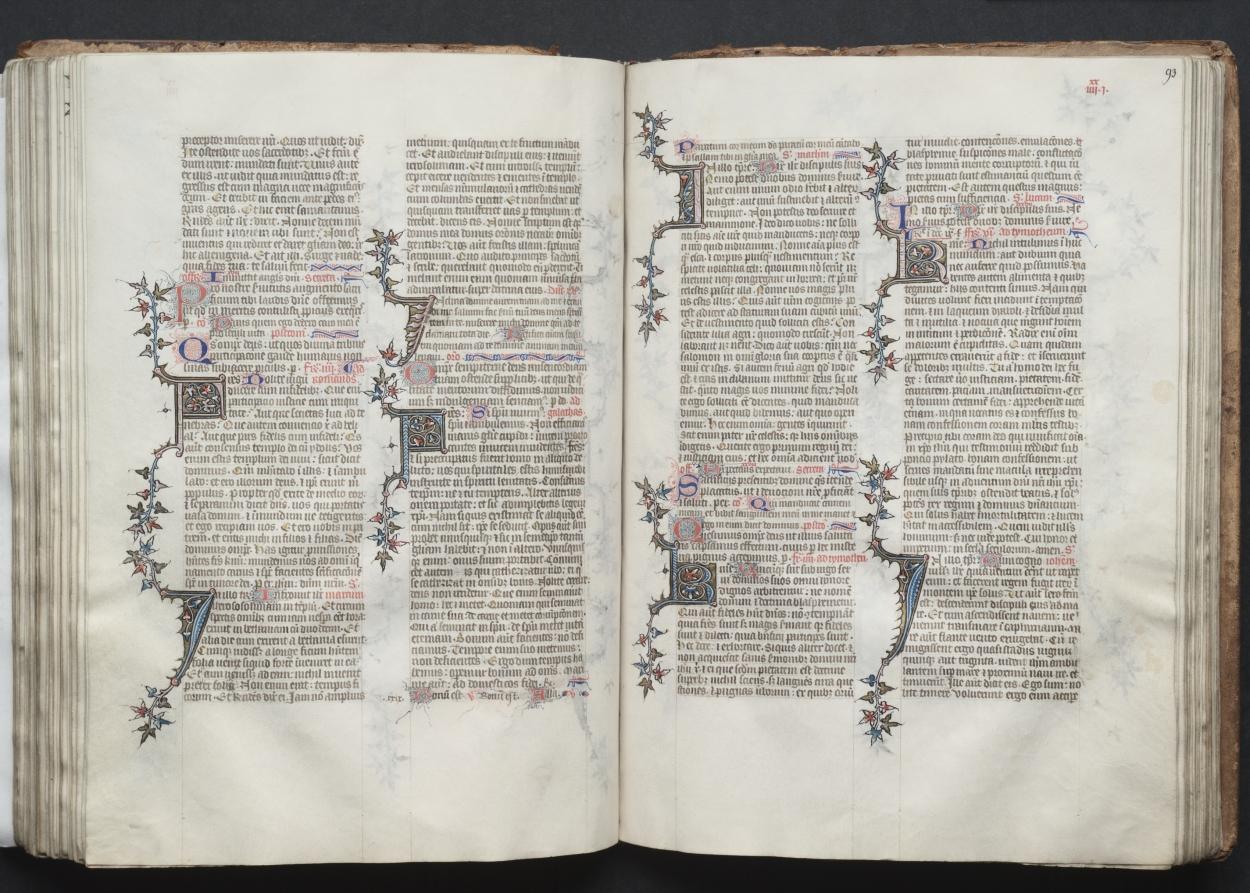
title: The Gotha Missal: Fol. 93r, Text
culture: France, Paris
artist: Master of the Boqueteaux (French)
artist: and Workshop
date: c. 1375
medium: ink, tempera, and gold on vellum; blind-tooled leather binding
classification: Bound Volume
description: The style and quality of this manuscript's decoration is typical of deluxe Parisian books made for aristocratic or royal patrons. Most of the book's decoration appears to be the work of the Master of the Boqueteaux, an artist active at the court of King Charles V (died 1380). His style was apparently shared by a number of book illuminators working in and around Paris. It is very possible that the Gotha Missal belonged to Charles V, but is not provable because the manuscript has no royal portraits and lacks a colophon. Given the book's magnificent decoration, however, it would seem that it was produced for a Valois prince, if not for the king himself. The manuscript receives its name from the German dukes of Gotha, its later owners.